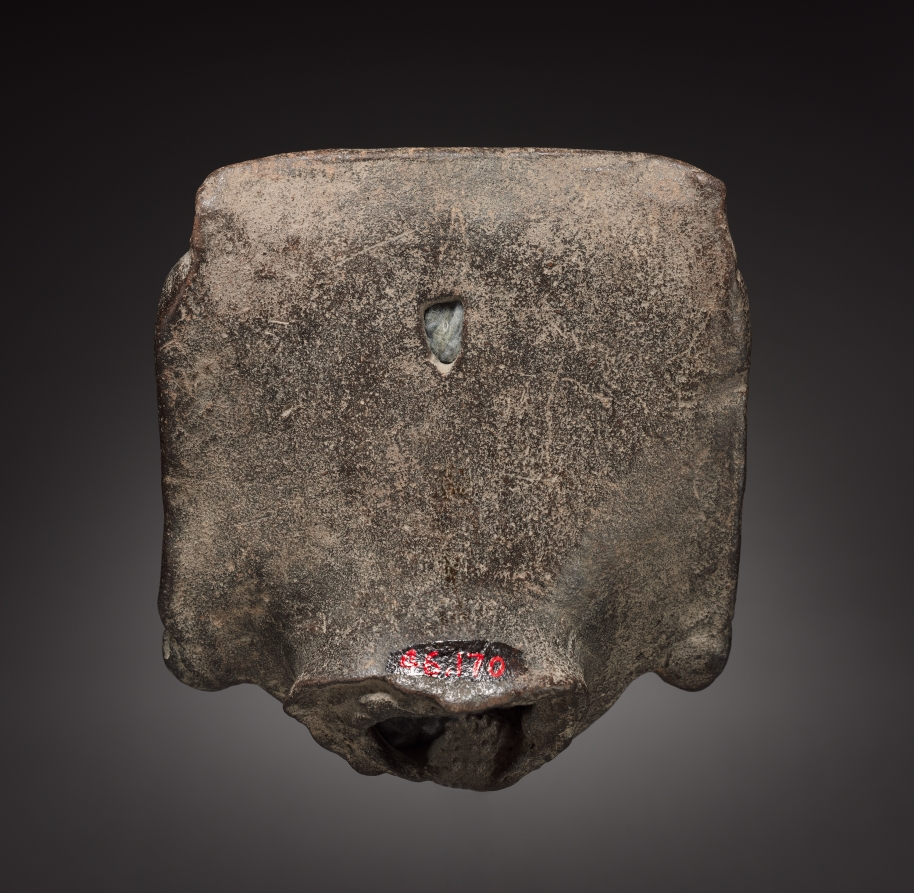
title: Head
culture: Mexico, Classic Veracruz (Remojados Culture)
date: 600–1100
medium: terracotta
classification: Sculpture